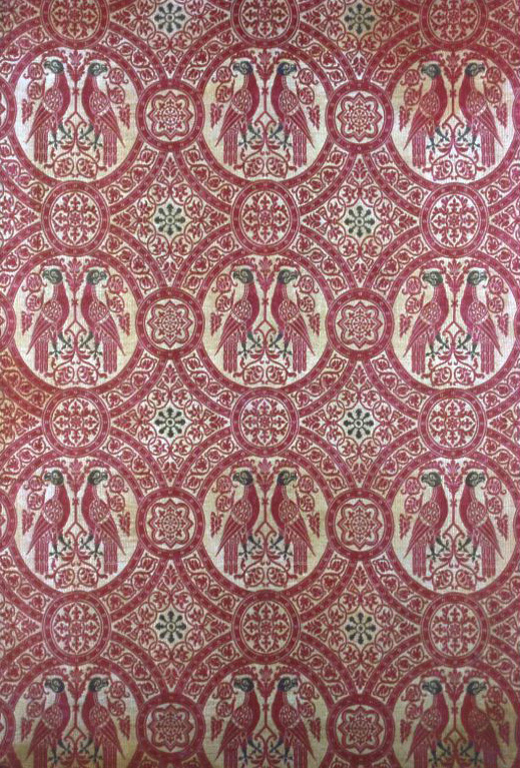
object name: Textile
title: Panel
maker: Italy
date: 1872 (reproduction of a 12th–century design)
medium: Silk, cotton, and gilt-metal-strip-wrapped wild silk, plain weave with plain interlacings of secondary binding warps and supplementary patterning and brocading wefts; woven on loom with Jacquard attachment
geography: Italy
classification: textile; weaving